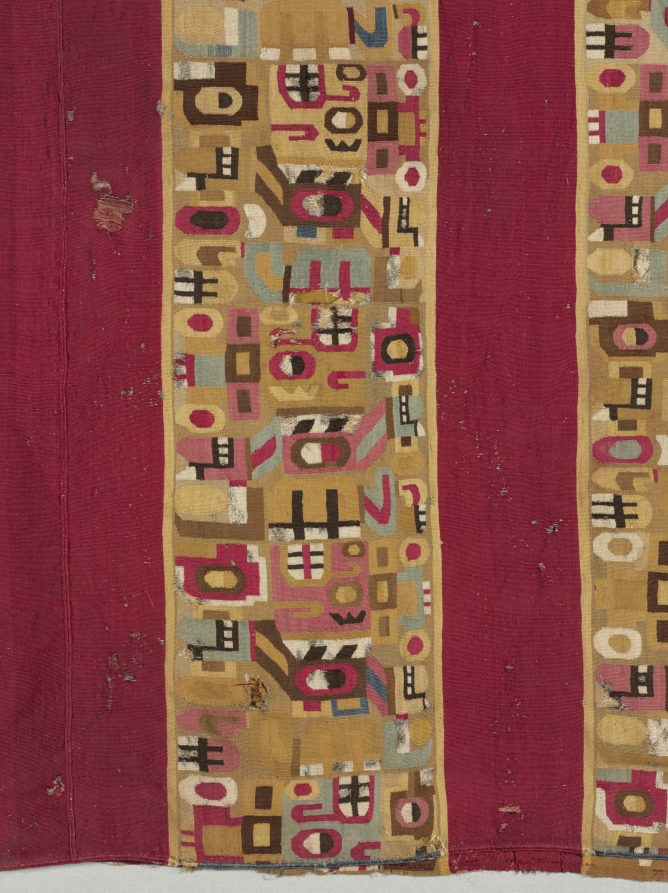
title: Tunic with Sacrificer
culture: South America, Peru, Central Andes, Middle Horizon, Wari people, 7th-11th century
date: 600–1000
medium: camelid-fiber, cotton; tapestry weave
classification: Textile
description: An extremely abstract supernatural sacrifice repeats in different colors and orientations across the body of this tunic, which was shortened on one side in antiquity. Look for the toothy black-and-white mouth in the sacrificer's upward-gazing head; other facial features include a button nose and a vertically divided eye. The figure holds the L-shaped haft of an axe behind its back and, at the front of its body, a short staff with a severed, upside-down human head on the top.